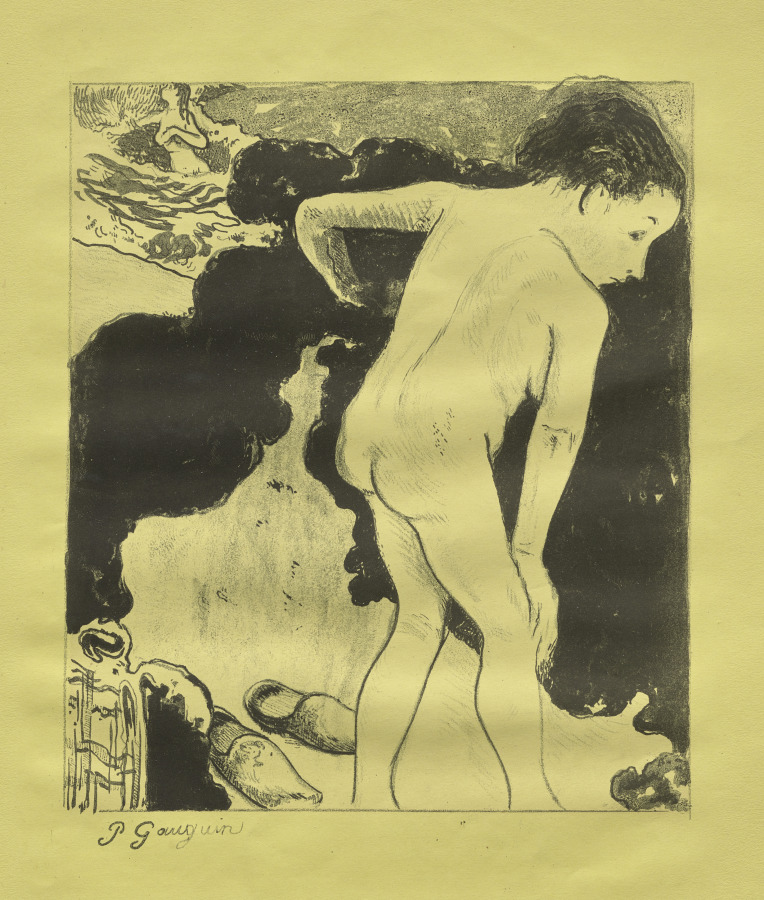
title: Breton Bathers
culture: France, 19th century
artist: Paul Gauguin (French, 1848–1903)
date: 1889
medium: lithograph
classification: Print